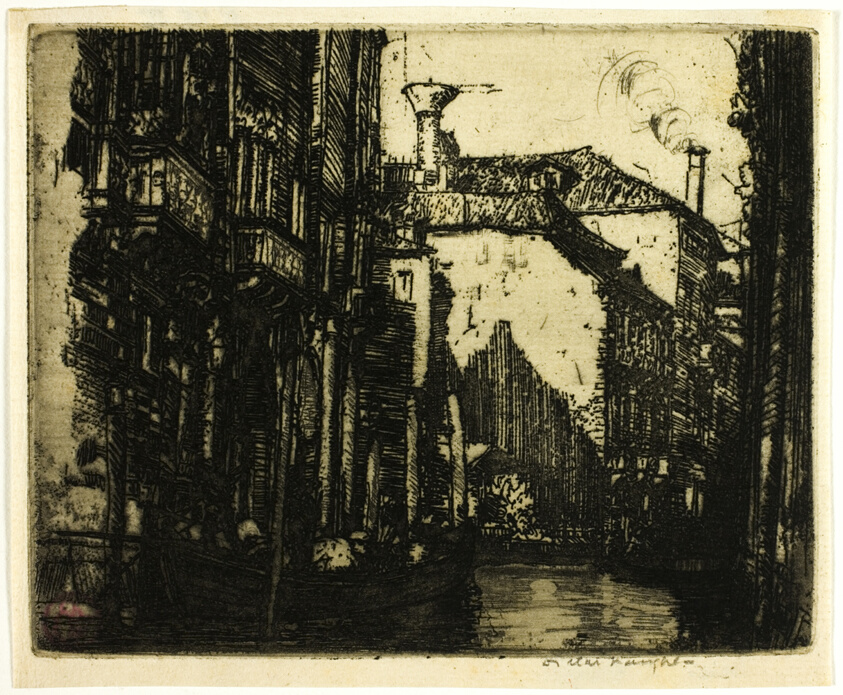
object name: Print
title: The Dark Canal, Venice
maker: Donald Shaw MacLaughlan (American, born Canada, 1876-1938)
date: 1908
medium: Etching in black on cream laid paper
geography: United States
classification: etching; print; prints and drawing